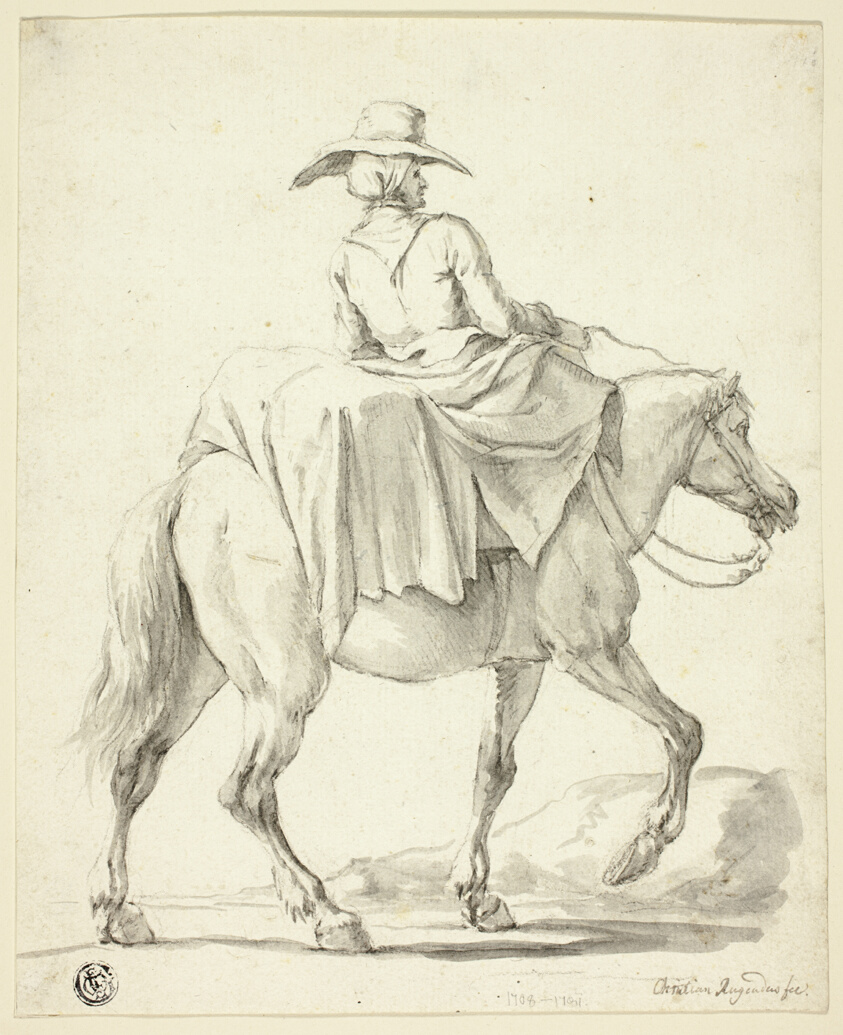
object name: Drawing and Watercolor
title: Market Woman on Horseback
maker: Christian Rugendas (German, 1708-1781)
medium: Black chalk and brush and gray wash on ivory laid paper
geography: Germany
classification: ink or chalk wash; drawings (visual works); prints and drawing